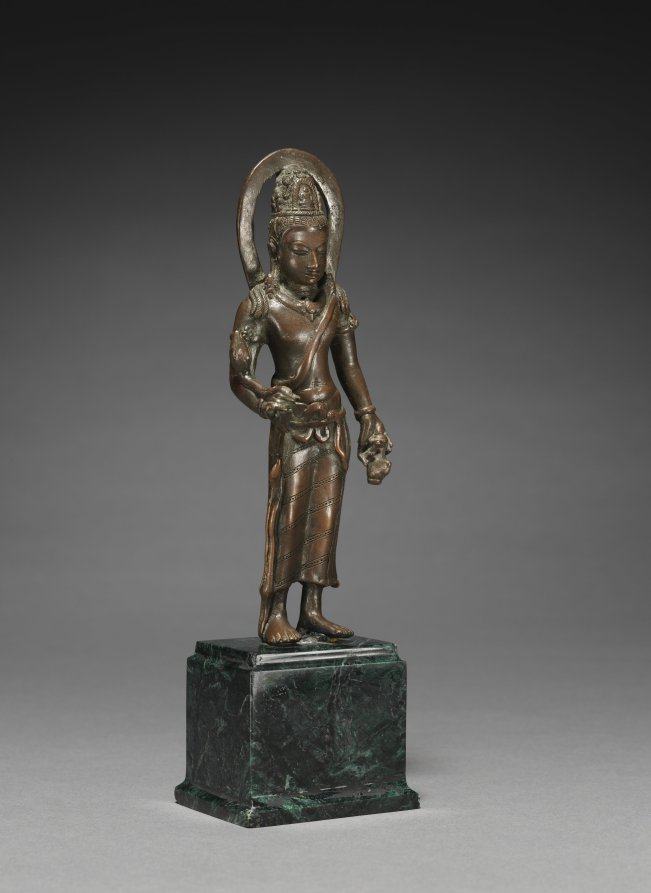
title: Padmapani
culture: Java, Pagan, Sailendra Period, 8th-9th Century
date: 700s-800s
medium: copper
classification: Sculpture